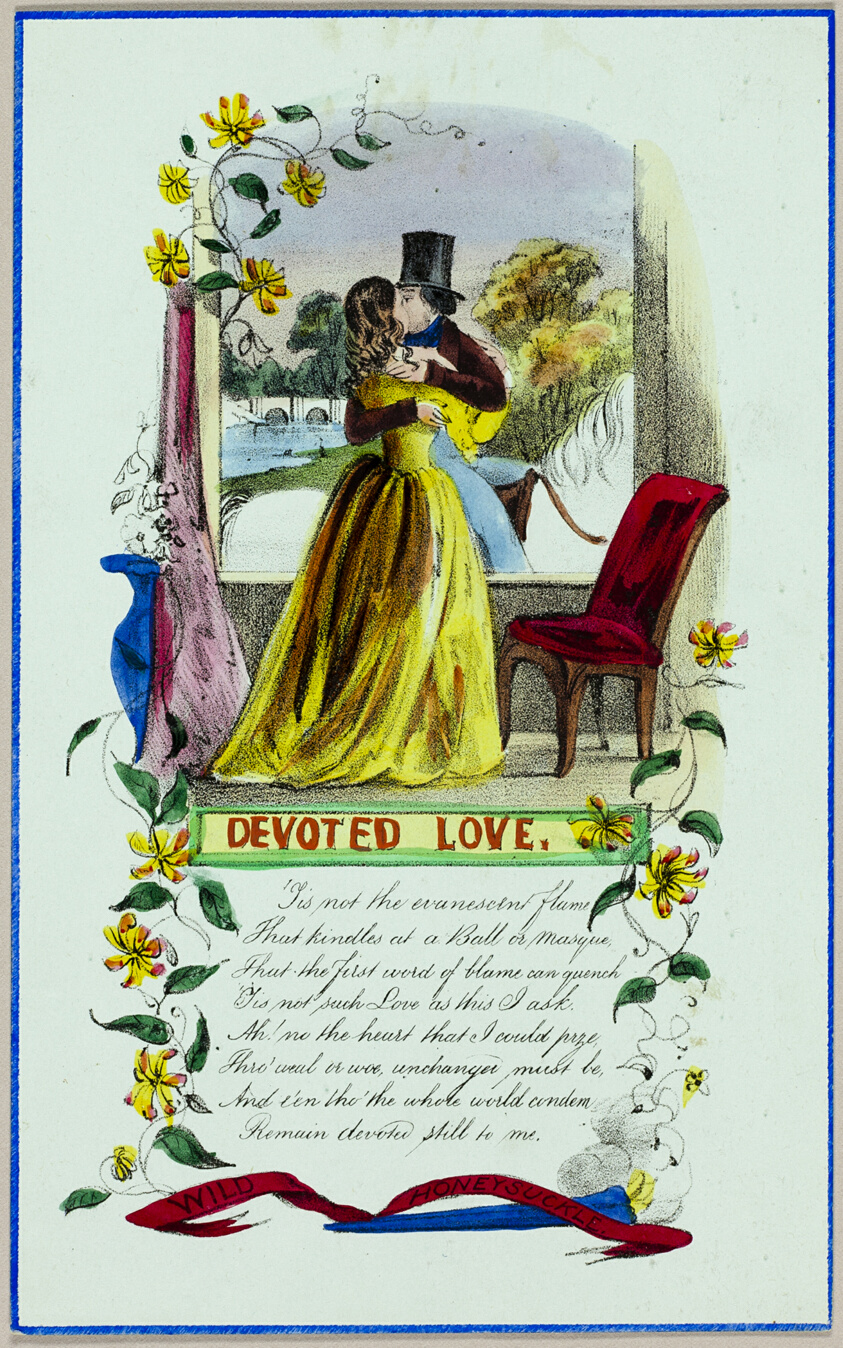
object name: Print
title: Devoted Love (valentine)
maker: Unknown Artist; English, 19th century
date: c. 1840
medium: Lithograph with hand-coloring on blue-green laid paper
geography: England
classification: valentine; prints and drawing; print